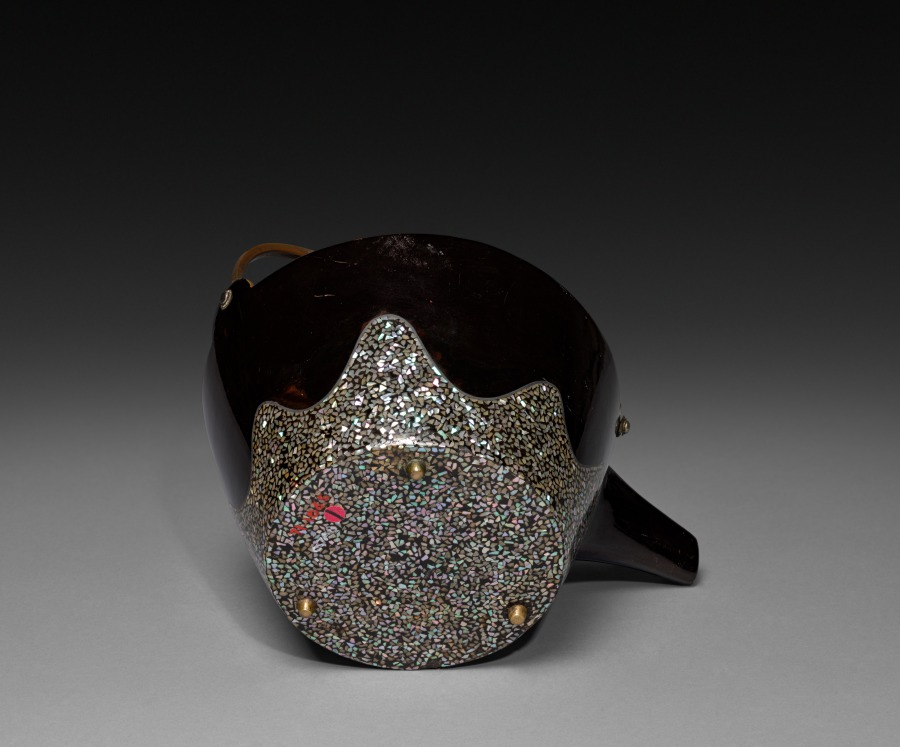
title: Wine Ewer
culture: Japan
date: late 1700's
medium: lacquer, nacre and metal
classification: Lacquer